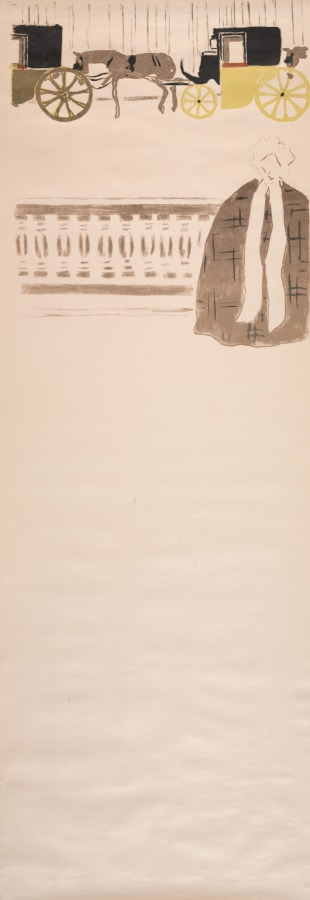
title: Nursemaids’ Promenade, Frieze of Carriages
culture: France, 19th century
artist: Pierre Bonnard (French, 1867–1947)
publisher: Molines, Galeries Lafayette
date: 1895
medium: color lithographs on wove paper, screen with four panels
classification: Print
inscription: signed on 2008.31.c, lower right, on stone: PB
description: This charming scene of a nanny and her three charges extends across four panels meant to be mounted as a folding screen. Pierre Bonnard emulated the solidly colored flat forms of Japanese color woodcut prints, which he collected. He featured the screen in his first solo exhibition at Paris's prestigious Galeries Durand-Ruel in 1896.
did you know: Although this screen was issued in an edition of 110, only about 20 copies survive today.